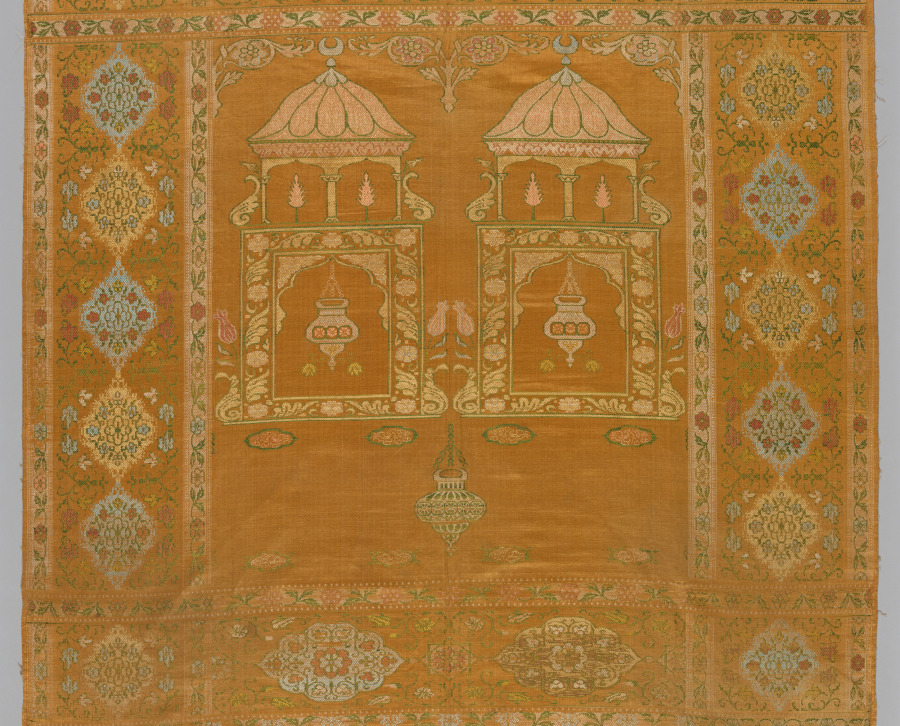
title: Coverlet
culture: Turkey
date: 1800s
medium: silk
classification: Textile